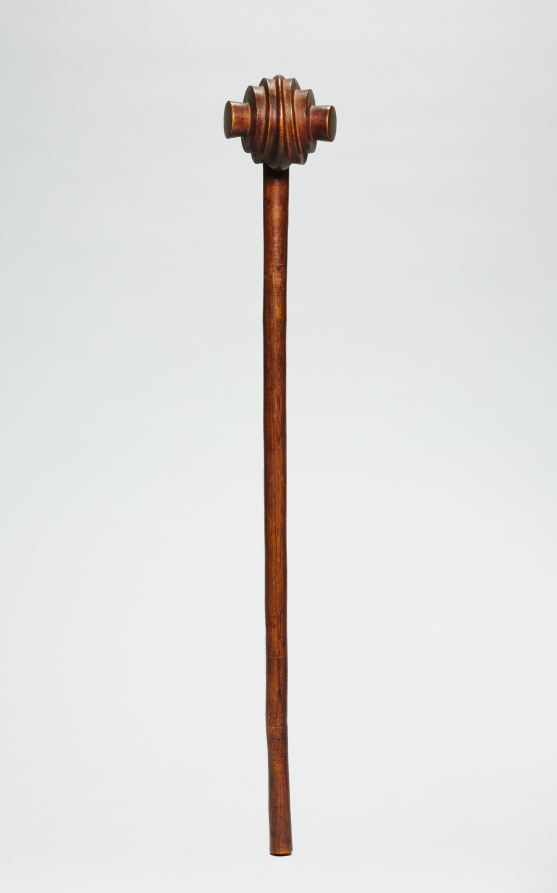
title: Club (Knobkerrie)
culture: Africa, Southern Africa, Kingdom of Eswatini, Swazi-style maker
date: 1800s–1900s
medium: Wood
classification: Arms and Armor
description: Relatively short sticks historically used for hunting and fighting are customarily called knobkerries. A combination of Afrikaans and Shona words, the name refers to the characteristic spherical knob of wood (knop) or head atop a cylindrical shaft (kirri). The knobs on these were carved into a tight whorl and a compressed sphere with a central rib. Even though their basic shapes were derived from real weapons, many of these precious objects were rarely if ever used as such. Highly personal, they instead functioned as ceremonial display items or regalia, symbolizing the masculinity and prowess of their owner.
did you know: The term knobkerrie refers to a characteristic spherical knob of wood or head atop a cylindrical shaft.